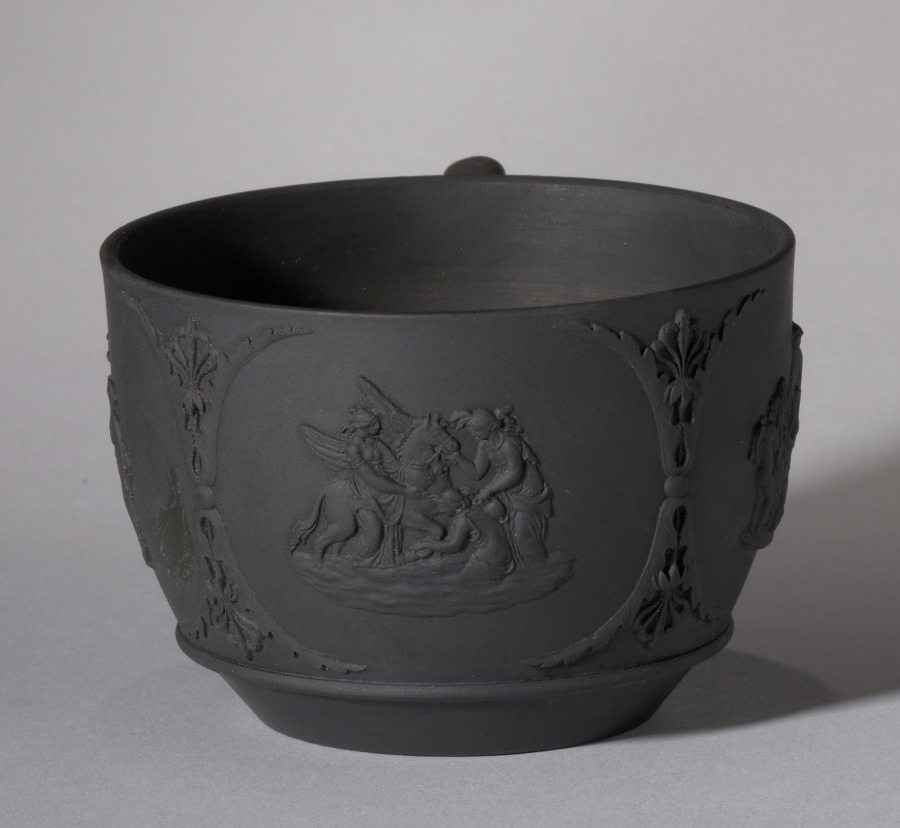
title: Cup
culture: England, Staffordshire, 19th century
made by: Wedgwood Factory (British)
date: 1800s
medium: black basalt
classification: Ceramic